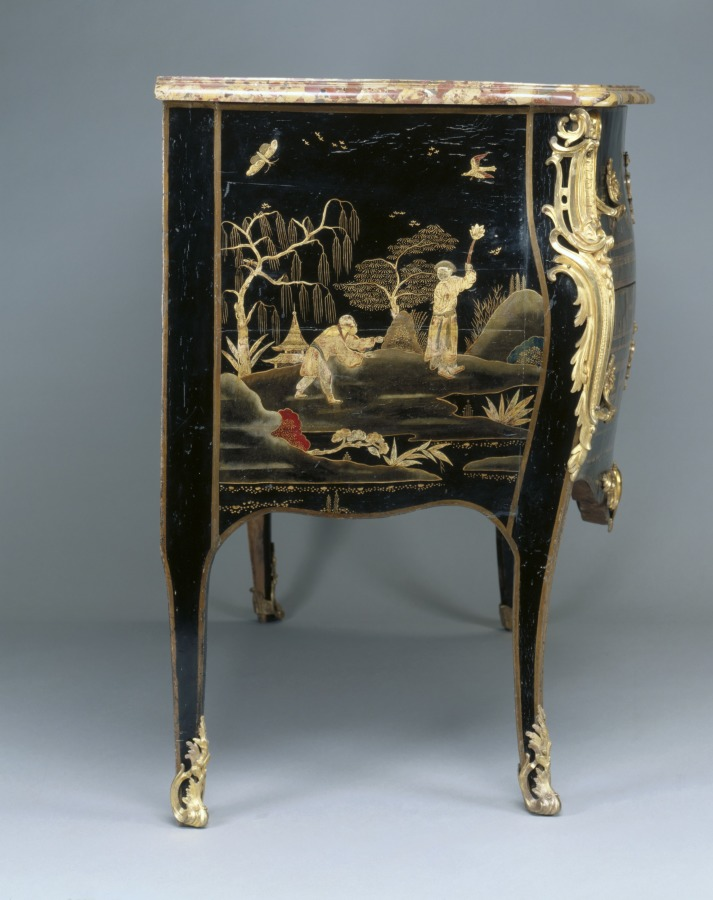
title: Chest of Drawers (Commode)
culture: France, 18th century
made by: probably by Adrien Faizelot Delorme (French)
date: c. 1750– 1765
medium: oak, black lacquer with raised chinoiserie decoration, gilt metal mounts, marble top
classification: Furniture and woodwork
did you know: Although this chest of drawers was made in France, its decoration is an imitation of Chinese lacquer, which reflects European perceptions of East Asia at the time.